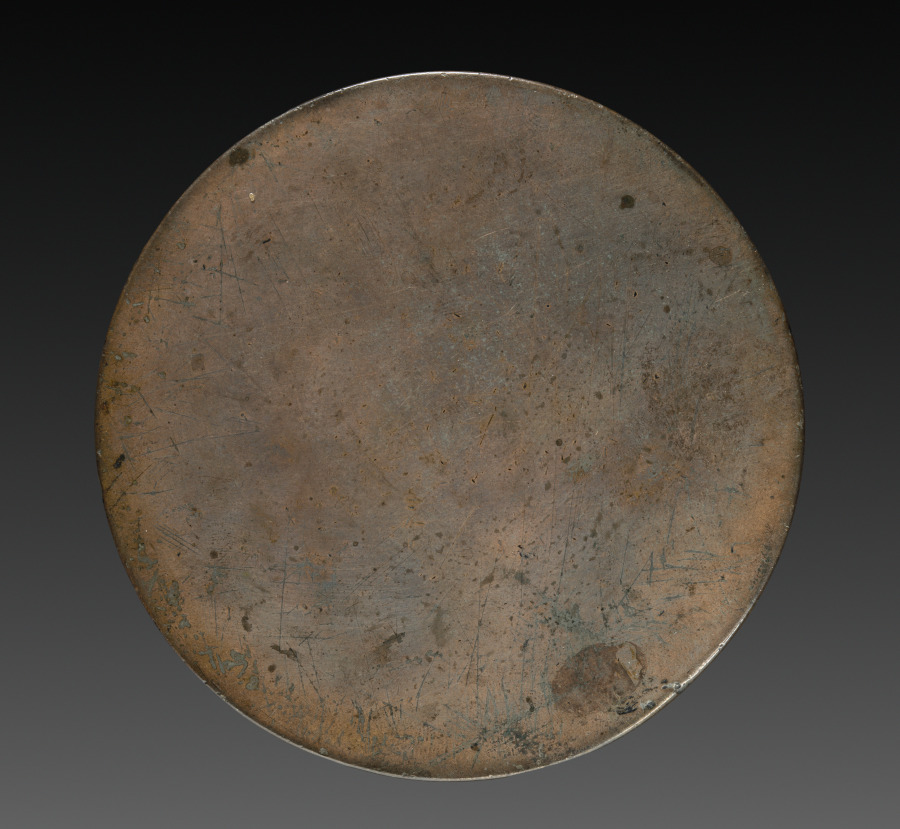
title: Mirror with Pair of Birds in Chrysanthemum Pattern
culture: Japan, Muromachi period (1392–1573)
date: 1392–1573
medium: bronze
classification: Metalwork